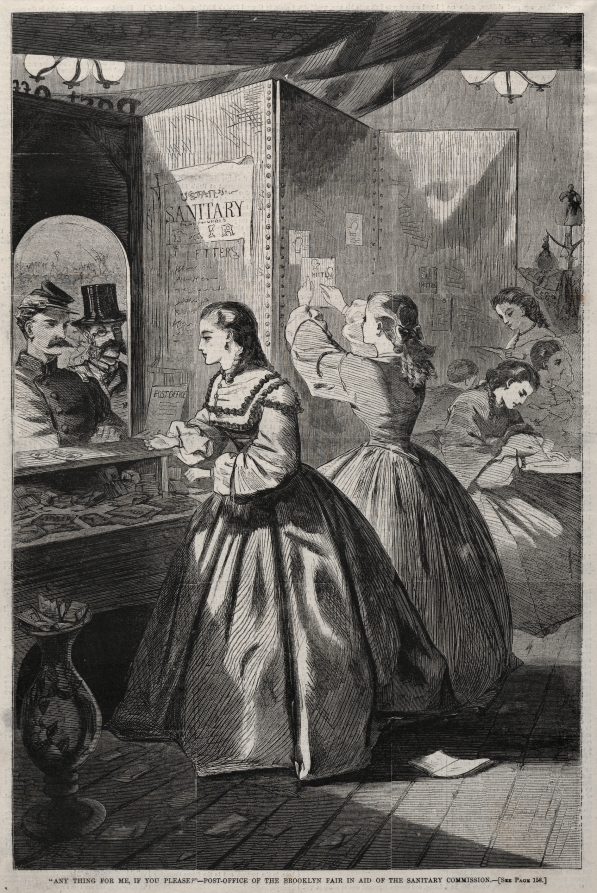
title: "Any Thing for Me, If you Please?" - Post-Office of the Brooklyn Fair in Aid of the Sanitary Commission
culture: America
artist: Winslow Homer (American, 1836–1910)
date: 1864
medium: wood engraving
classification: Print